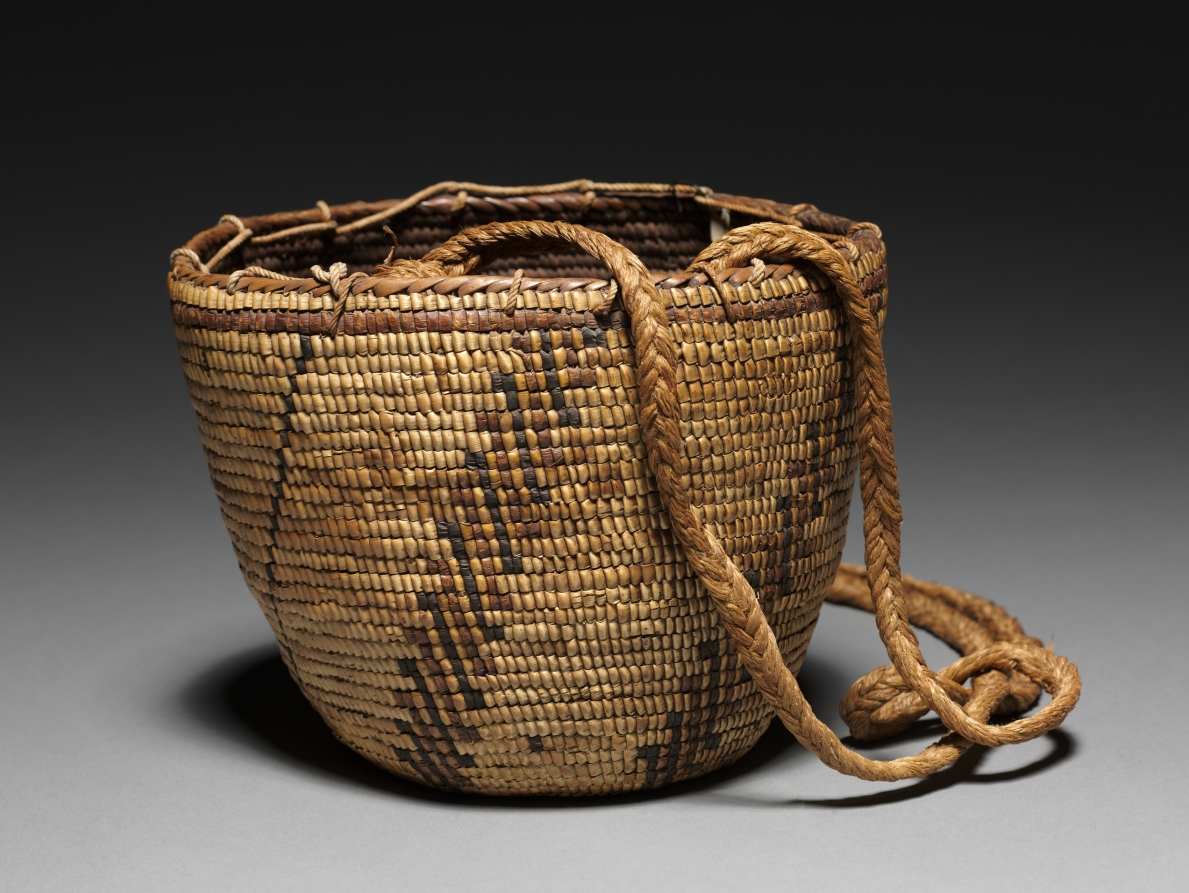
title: Berry Basket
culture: Northwest Coast, coastal, Salish, late 19th century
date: 1890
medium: woven, imbricated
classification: Basketry